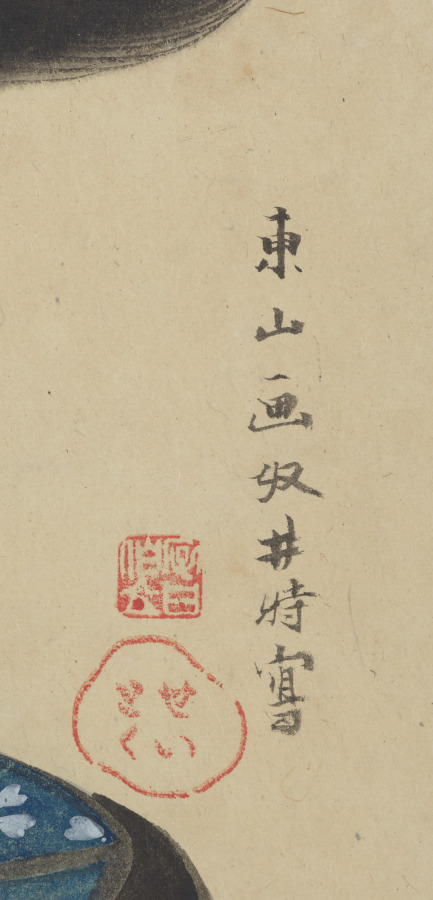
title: A Beauty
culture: Japan, Edo period (1615–1868)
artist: Gion Seitoku (Japanese, active late 1700s–early 1800s)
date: early 1800s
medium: hanging scroll; ink and color on paper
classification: Painting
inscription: 東山画奴井特寫 「字日伯立」白文方印・「せいとく」朱文千鳥印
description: A Kyoto-based ukiyo-e painter, Gion Seitoku specialized in portraying women from Gion and Shimabara, licensed brothel districts in that city. He was known for detailing faces with subtle modeling to heighten a sense of realism. During the 1700s and 1800s, wearing iridescent, greenish lip gloss made from safflower was in vogue. In addition, Japanese women almost universally practiced the custom of artificially blackening their teeth with a stain.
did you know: The person's lipstick is made from safflower.